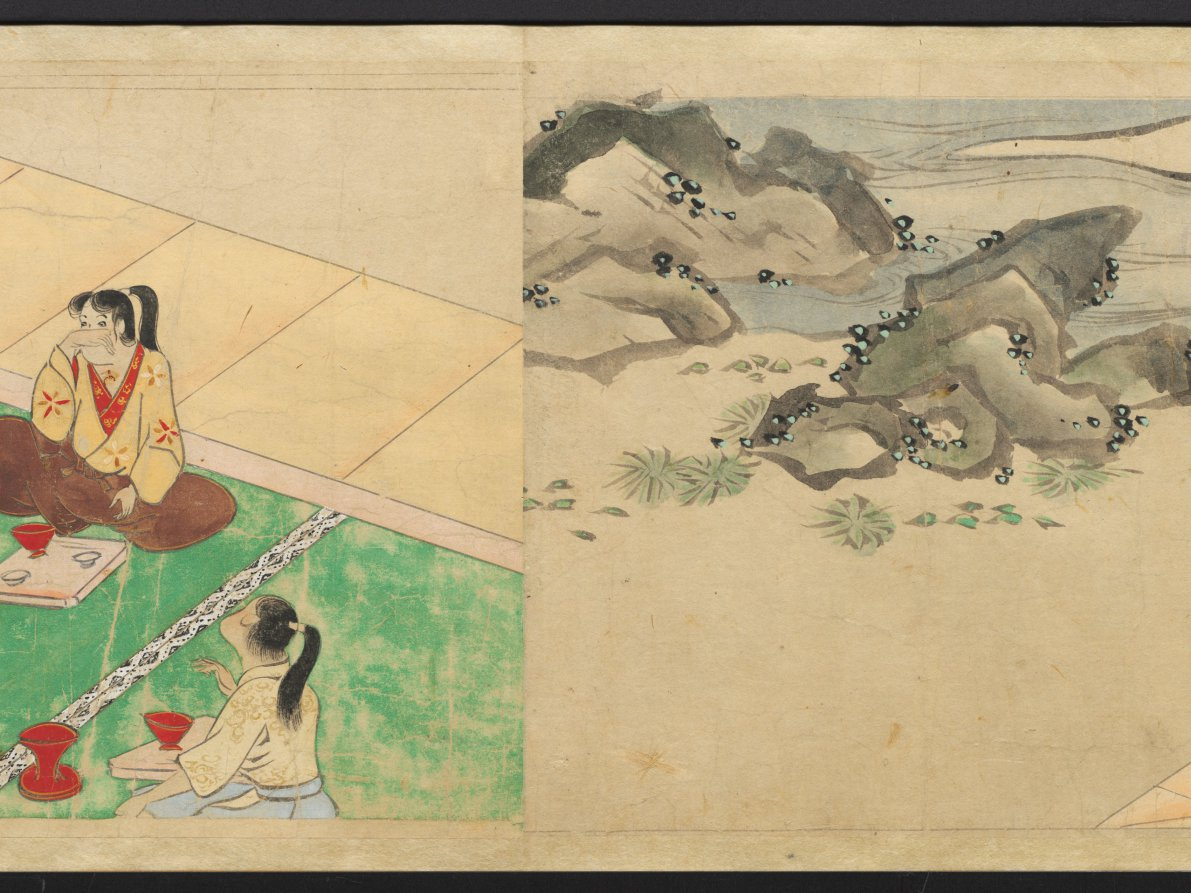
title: The Saltmaker's Story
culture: Japan, Edo period (1615–1868)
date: early 1600s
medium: One of a pair of handscrolls; ink, color, and gold on paper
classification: Painting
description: Once read and copied by girls at New Year’s celebrations and included in dowries, The Saltmaker’s Story is a rags-to-riches tale in which daughters are gifts from the gods. Despite his simple outlook, the main character progresses from humble roots as an associate at Kashima Shrine to the elite status of grandfather of the emperor through the intervention of the Kashima deity. The Saltmaker’s Story is traditionally presented in a set of three scrolls, but the text of this set has been removed by a previous owner, who remounted the illustrations as a pair. The paintings of this one take us from right to left through the second half of the tale.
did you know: This handscroll originally had texts before its paintings, but the texts were removed.